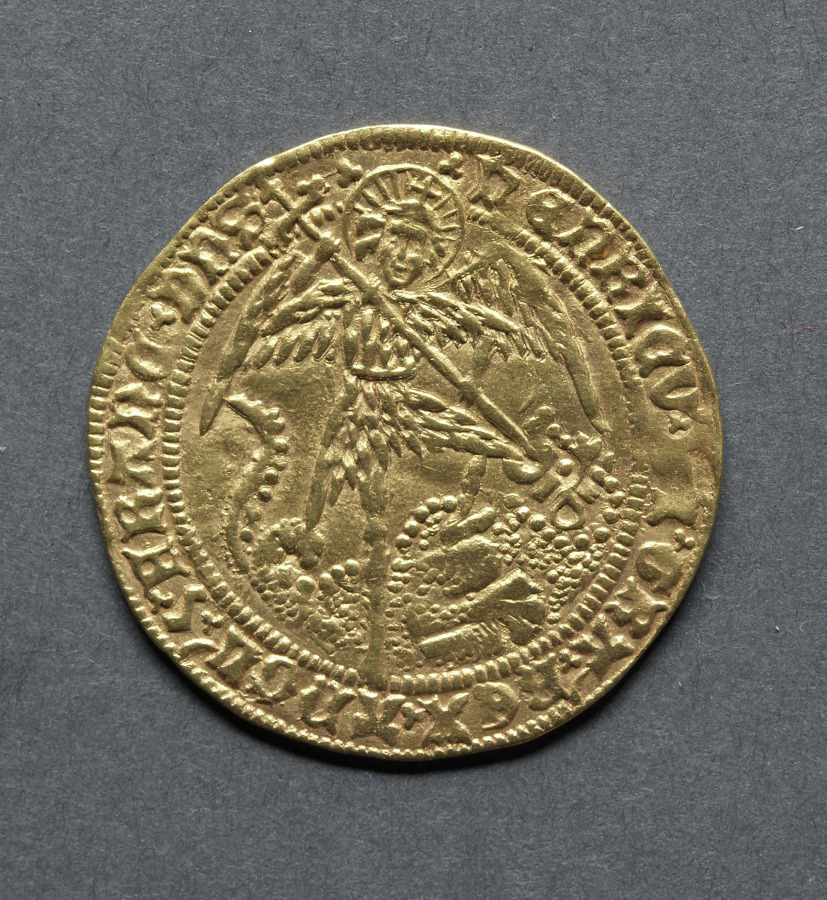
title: Angel: St. George Slaying the Dragon (obverse)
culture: England, Henry VI 1422-1461 (restored 1470-1471)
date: 1470–1471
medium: gold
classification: Coins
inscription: HENRIC VI DI GRA REX ANGL FRANC DNS